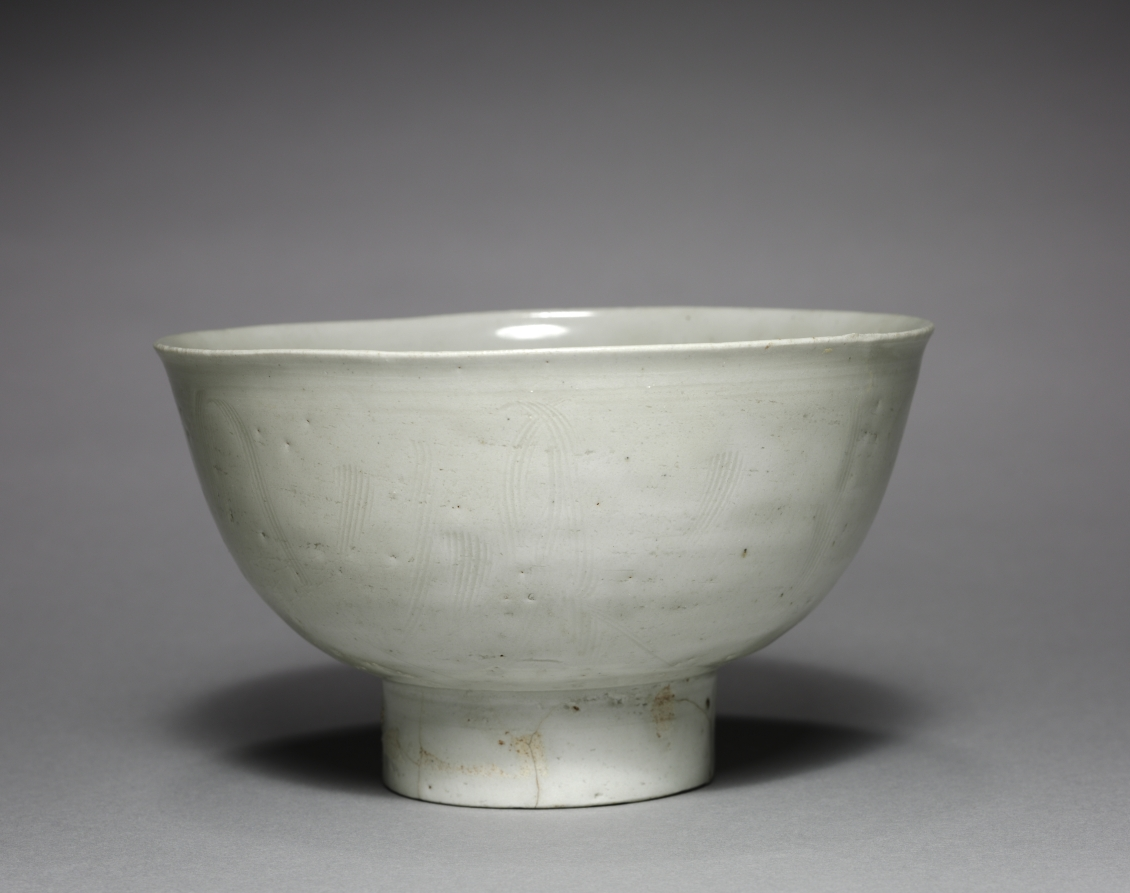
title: Bowl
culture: Korea, Goryeo dynasty (918–1392)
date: 1300s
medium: pottery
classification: Ceramic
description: While this cup was donated as a rare white celadon example excavated from a Goryeo period tomb, it turns out to be an imported Song period Chinese example. This suggests that many Korean elites during the Goryeo dynasty (918–1392) enjoyed various imported luxury from China known for its advanced ceramic production.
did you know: While this cup was donated as a rare white celadon example excavated from a Goryeo period tomb, it turns out to be an imported Song period Chinese example.